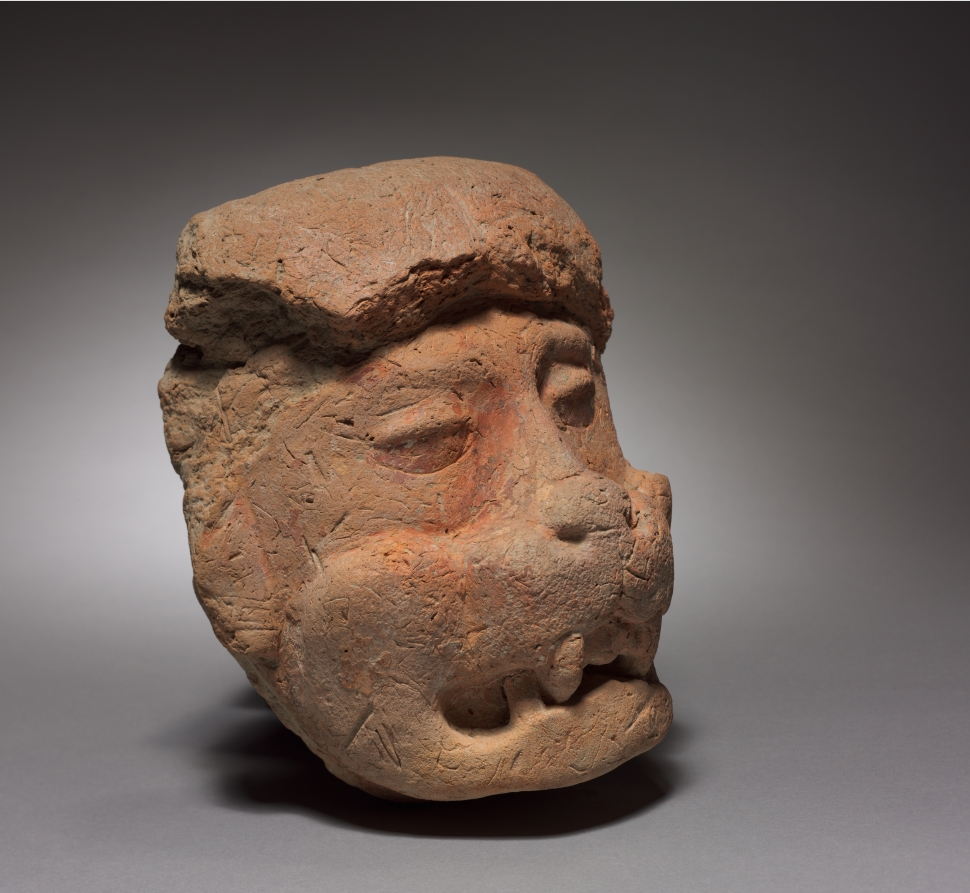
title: Architectural Sculpture Fragment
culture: Mexico, Oaxaca, Zapotec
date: c. 700–1000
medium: unfired clay, covered with painted stucco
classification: Ceramic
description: This architectural sculpture fragment probably once formed part of a tomb façade; technically similar sculptures have been found at the Zapotec site Lambityeco. Ancestral tombs were usually located beneath the courtyard of the family home and were often reused for successive generations. This image of a man wearing a feline mask over the lower face may portray a lineage founder.